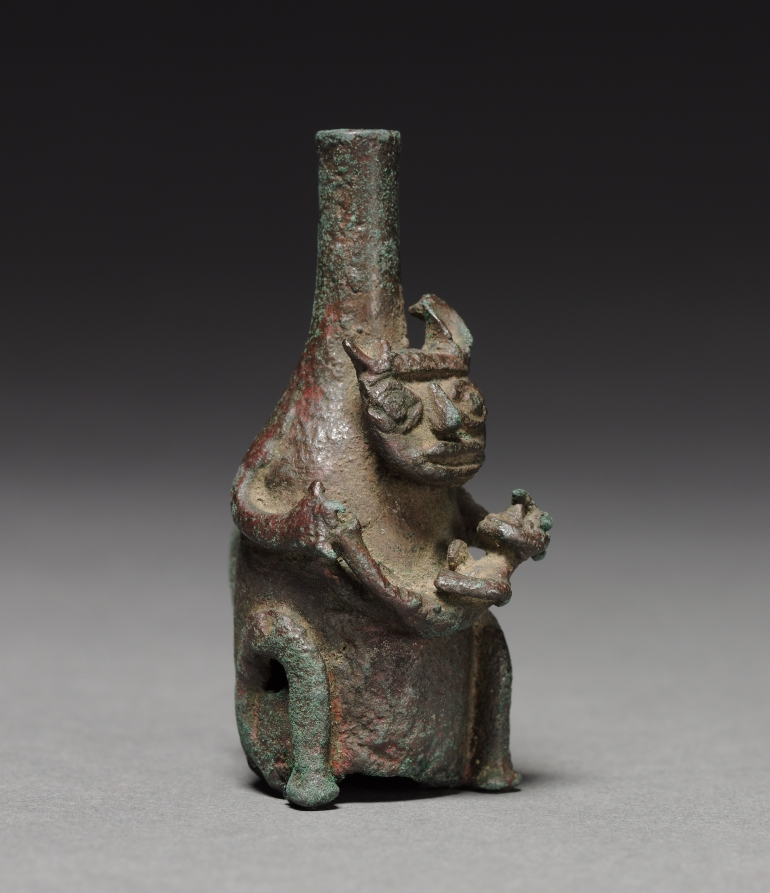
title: Feline Holding Human Figure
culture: Peru, North Coast, Moche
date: c. 100–500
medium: banded travertine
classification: Metalwork